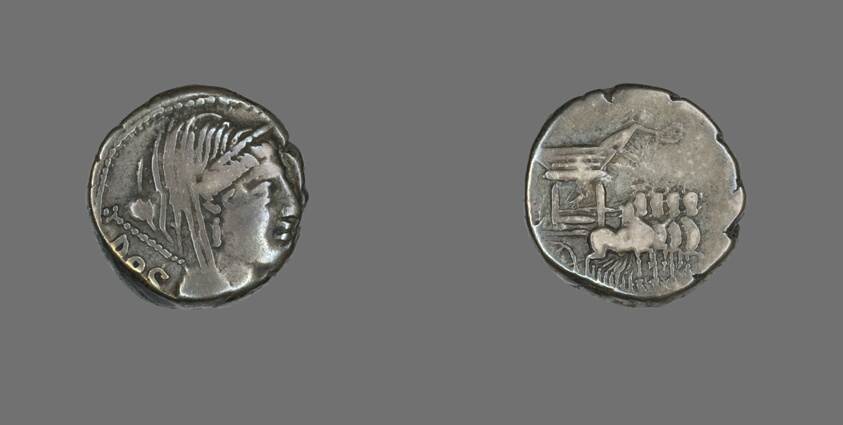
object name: Coin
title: Denarius (Coin) Depicting the Goddess Juno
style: roman (ancient, style or period), ancient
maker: Roman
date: about 87 or 83 BCE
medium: Silver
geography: Roman Empire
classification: coin; ancient art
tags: Chariots